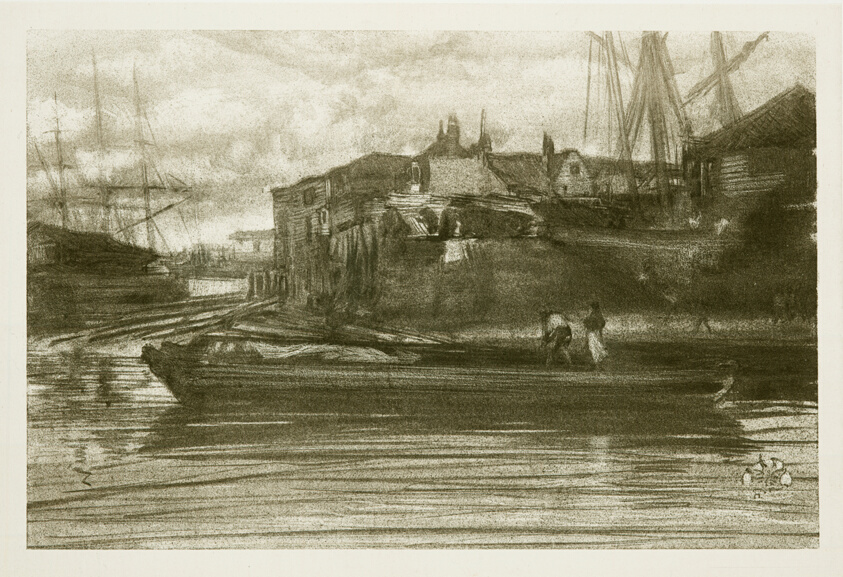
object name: Print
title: Limehouse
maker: James McNeill Whistler (American, 1834-1903)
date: 1878, published 1887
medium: Lithotint, on a prepared half-tint ground, in black with scraping and incising, on cream chine, laid down on ivory plate paper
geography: United States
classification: lithotint; lithograph; print; prints and drawing; paper